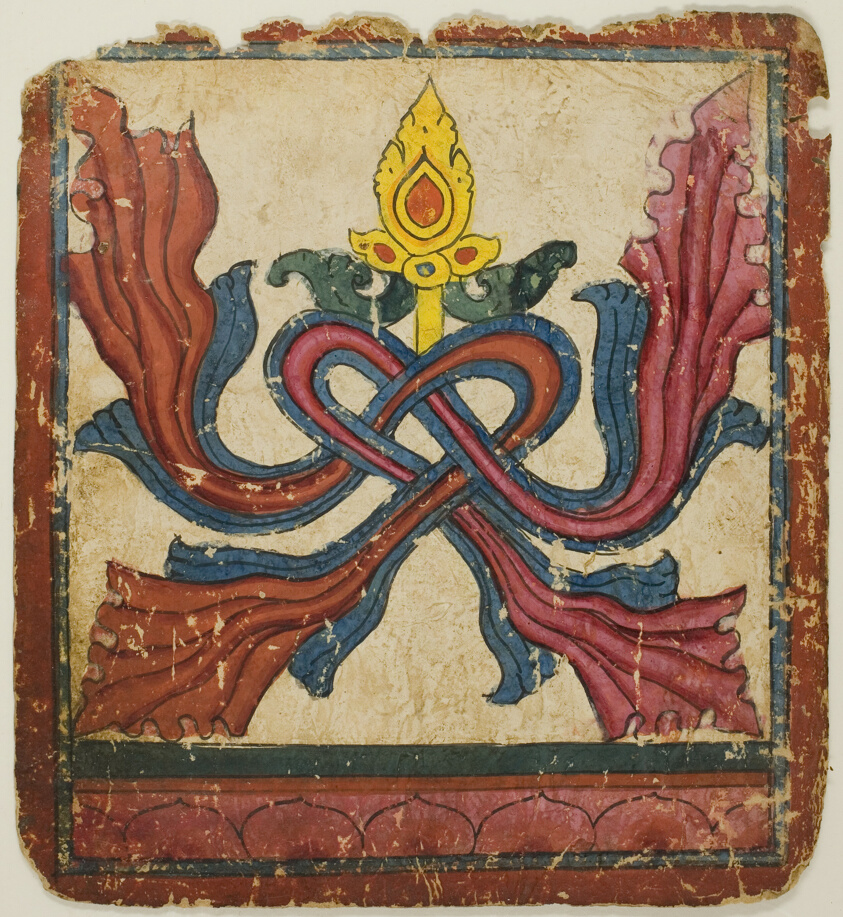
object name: Painting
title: Image from a Set of Initiation Cards (Tsakali)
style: Himalayan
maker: Southern Tibet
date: 14th/15th century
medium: Ink and watercolor on paper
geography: Tibet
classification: ink; painting